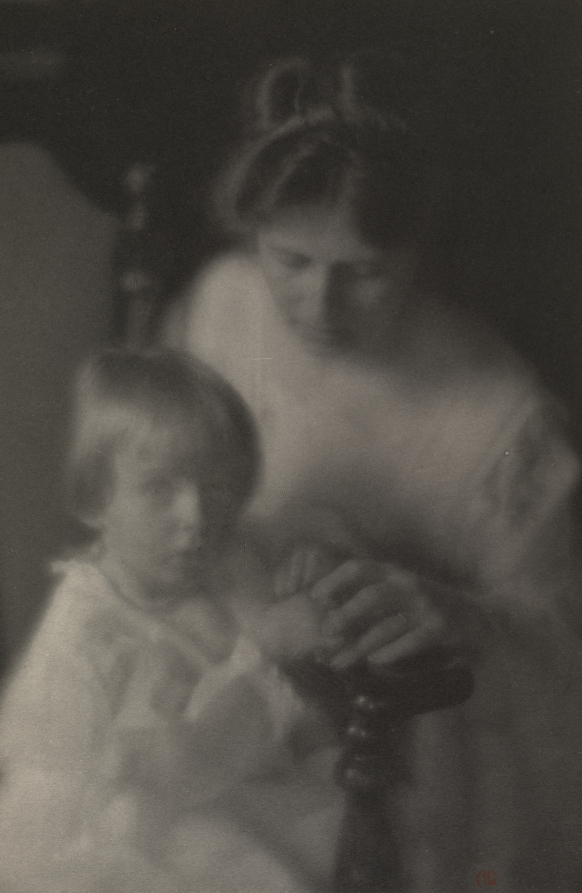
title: Julia McCune Flory and Elizabeth Flory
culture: America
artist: Clarence H. White (American, 1871–1925)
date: 1915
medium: platinum print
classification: Photograph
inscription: Written in red ink on recto of photo: "CHW"; in pencil on recto of original mount: "Clarence H. White [signed] '15"